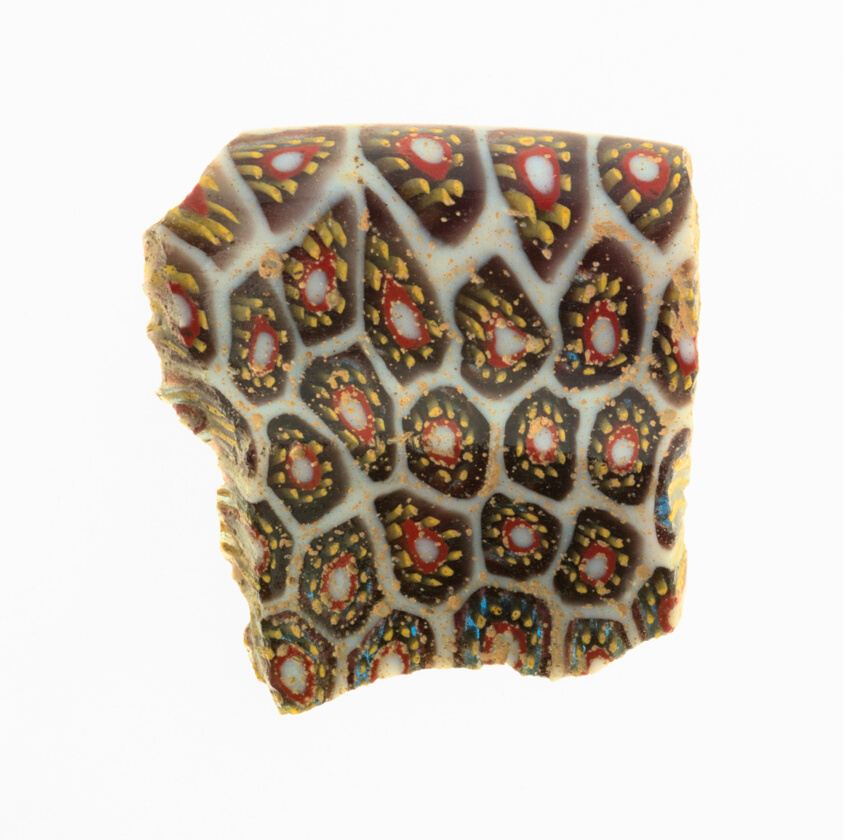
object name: Decorative Arts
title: Fragment of a Cup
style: roman (ancient, style or period), ancient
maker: Roman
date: 1st century BCE–1st century CE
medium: Glass, mosaic glass technique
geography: Italy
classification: fragment; drinking vessel; decorative arts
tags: decoration